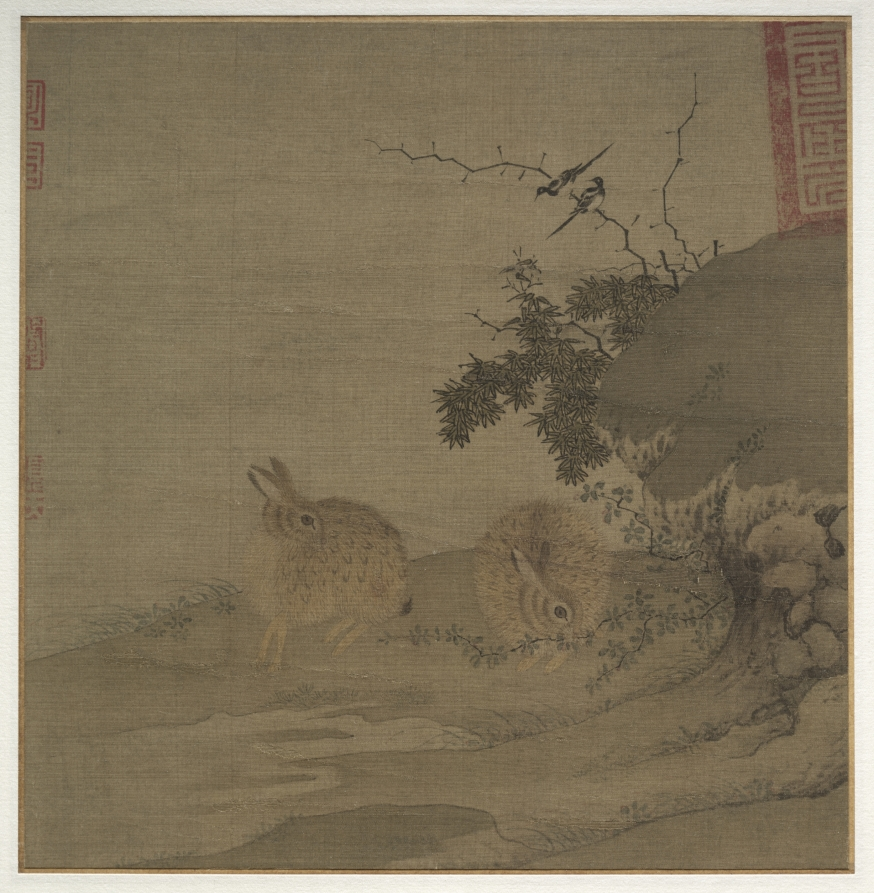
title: Magpies and Wild Rabbits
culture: China, Song dynasty (960-1279)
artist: Li Yong (Chinese, active 1200s)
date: 1200s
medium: album leaf, ink and light color on silk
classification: Painting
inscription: 1 official seal of Ming Dynasty.